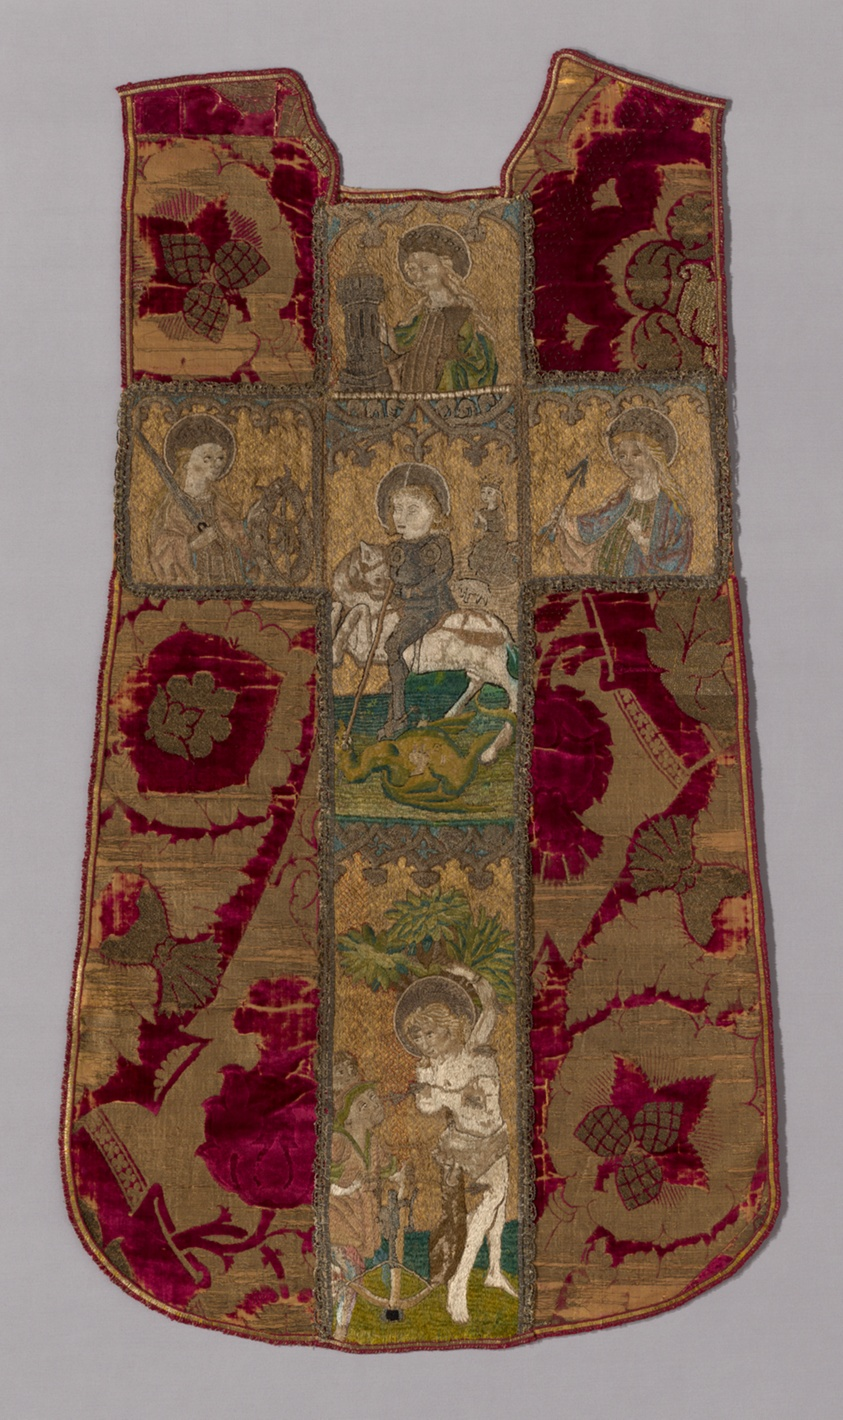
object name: Textile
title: Chasuble Front with Orphrey Cross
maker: Chasuble: Italy, Florence; Orphrey Cross: Bohemia or Germany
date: Chasuble: 15th century; Orphrey Cross: 1401/50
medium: Chasuble: silk and metal-wrapped thread, brocaded silk velvet with two heights of silk pile, and metal-wrapped threat boucle. Orphrey Cross: silk and metal-wrapped thread, embroidered in flat and padded couching stitches and split stitches on linen plain weave foundation.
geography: Florence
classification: textile; needlework (visual works); liturgical; weaving - velvet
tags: people, circles, fruit, religious scenes